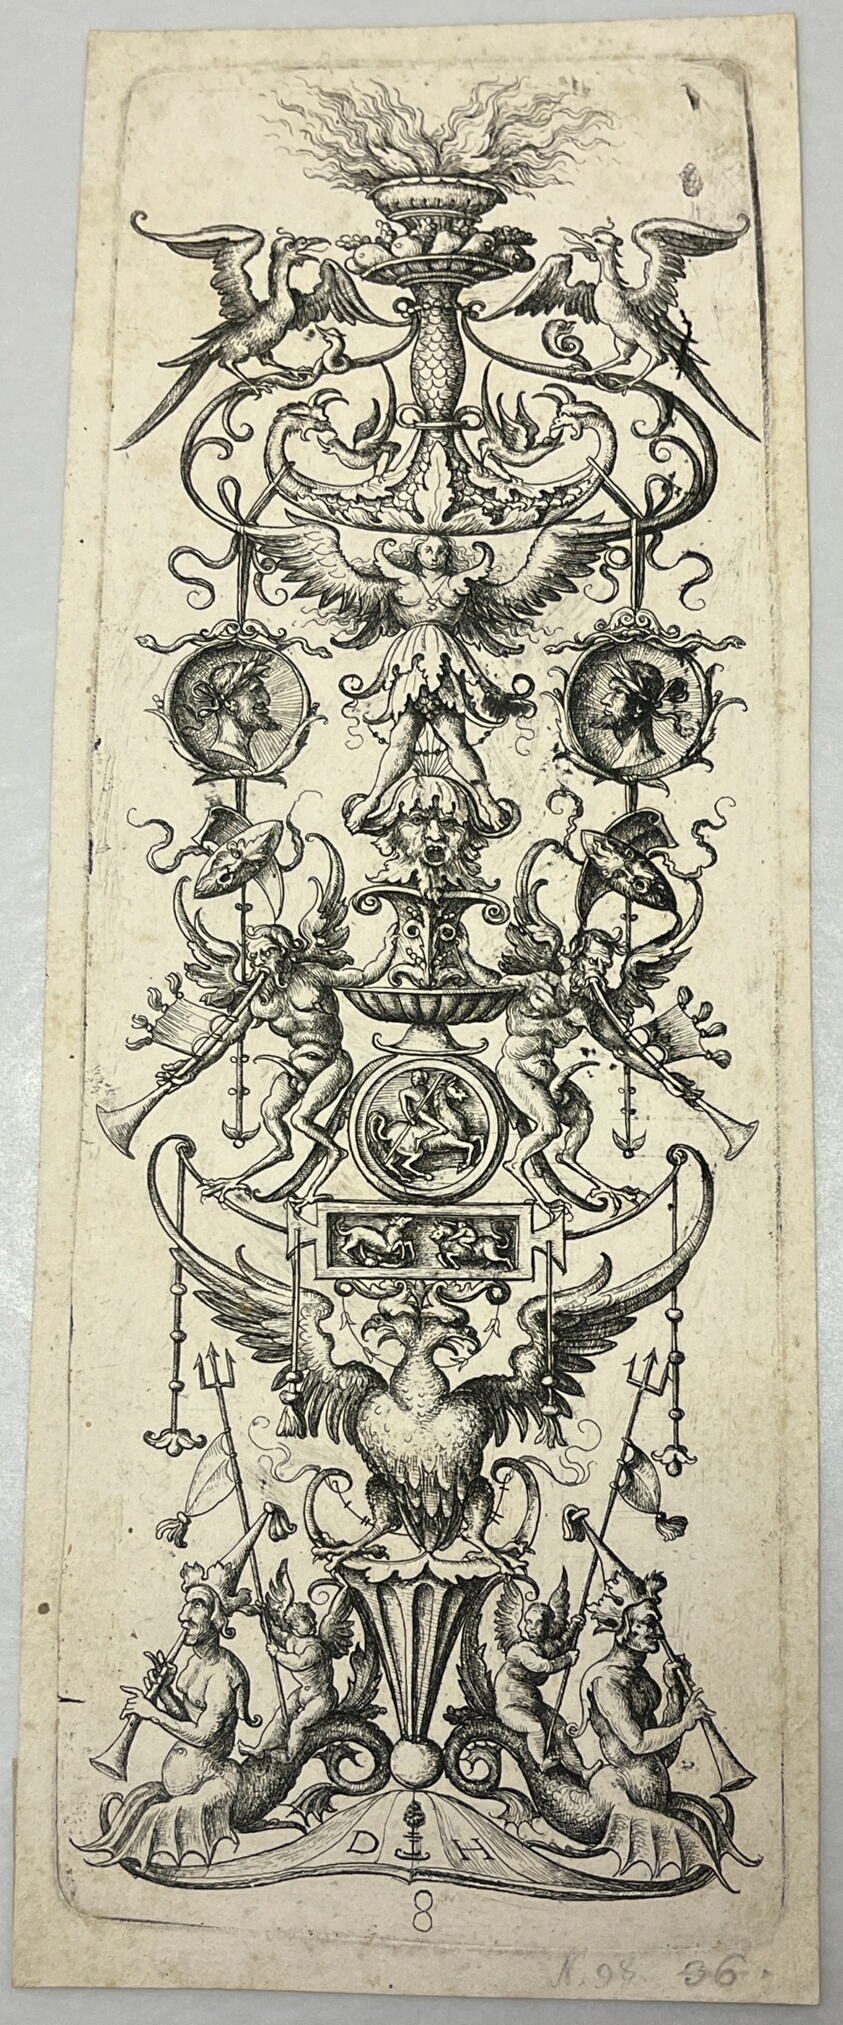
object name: Print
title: Grotesque Candelabra with Musical Sayrs and Relief Medallions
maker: Daniel I Hopfer (German, 1470-1536)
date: c. 1505–1536, printed c. 1802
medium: Etching in black on ivory wove paper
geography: Germany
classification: print; prints and drawing